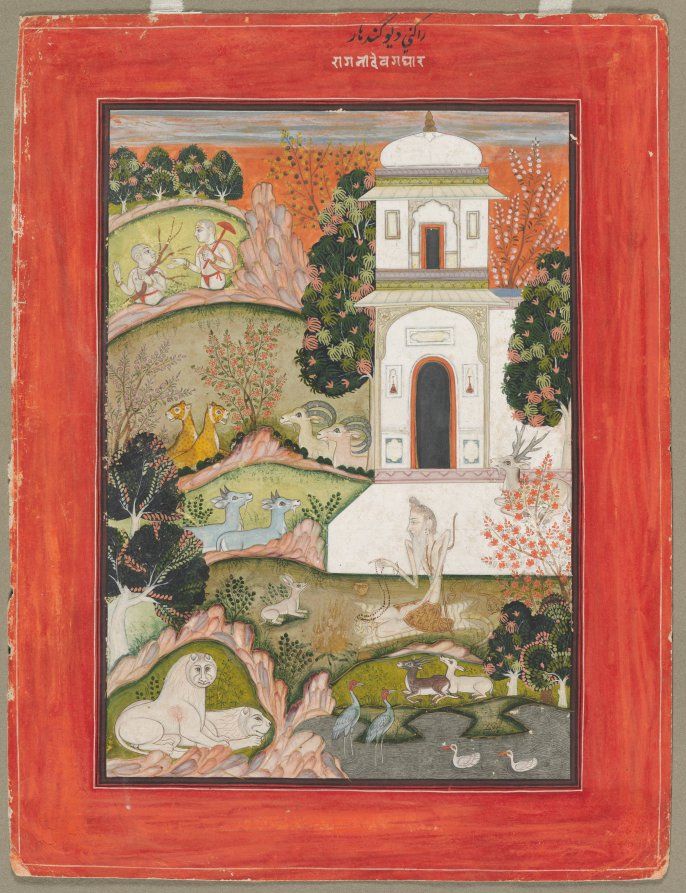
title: Devagandhara Ragini: An Ascetic in Retreat, from the Ragamala Series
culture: India, Rajasthan, Bundi-Kota school, 18th century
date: c. 1760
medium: color on paper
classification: Painting